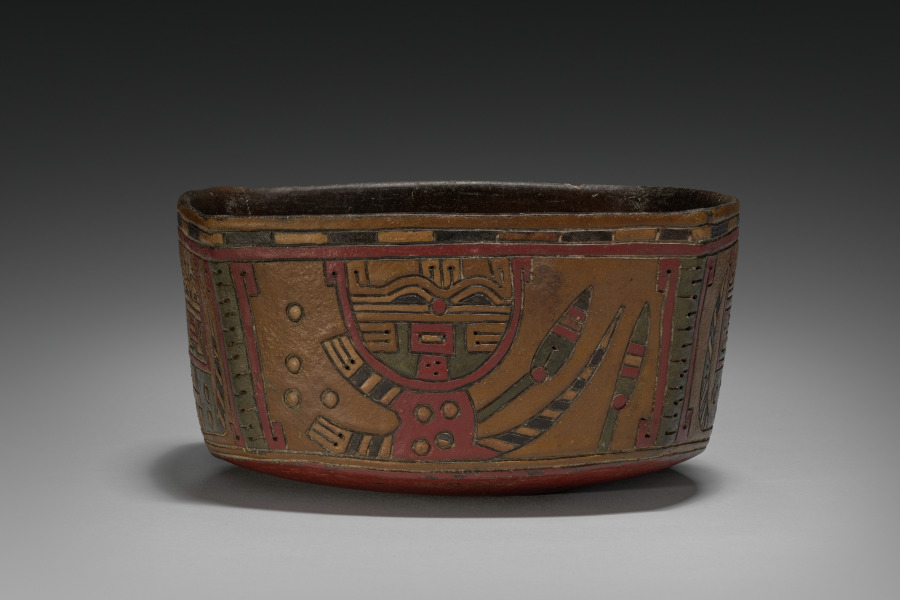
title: Square Bowl with Pampas Cats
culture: Central Andes, South Coast, Paracas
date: 500–400 BCE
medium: Ceramic, post-fire paint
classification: Ceramic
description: The Paracas often decorated their ceramics with geometricized representations of the native Pampas cat, a small, reclusive, wild feline that lives on the margins of agricultural fields, where it preys on the rodents and other pests that are a farmer’s bane. Thus, the ancients seem to have linked it to nature’s fertility and, by extension, human prosperity and continuity.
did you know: The animal shown on this bowl is the Pampas cat, a small, wild feline.